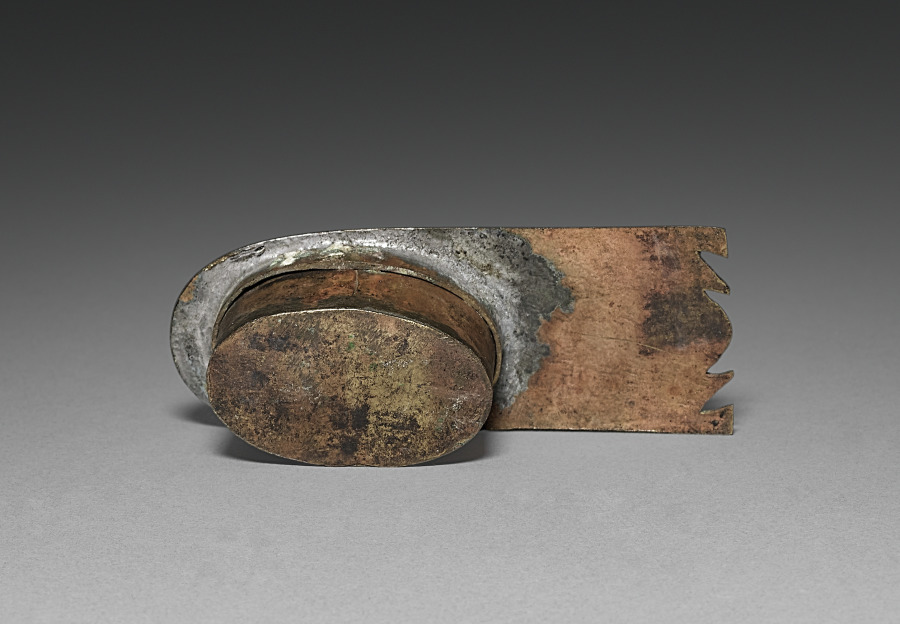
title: Pen and Ink Box (inkwell)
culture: Iran, probably Isfahan, Safavid period (1501–1722)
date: 1667–98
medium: brass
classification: Metalwork